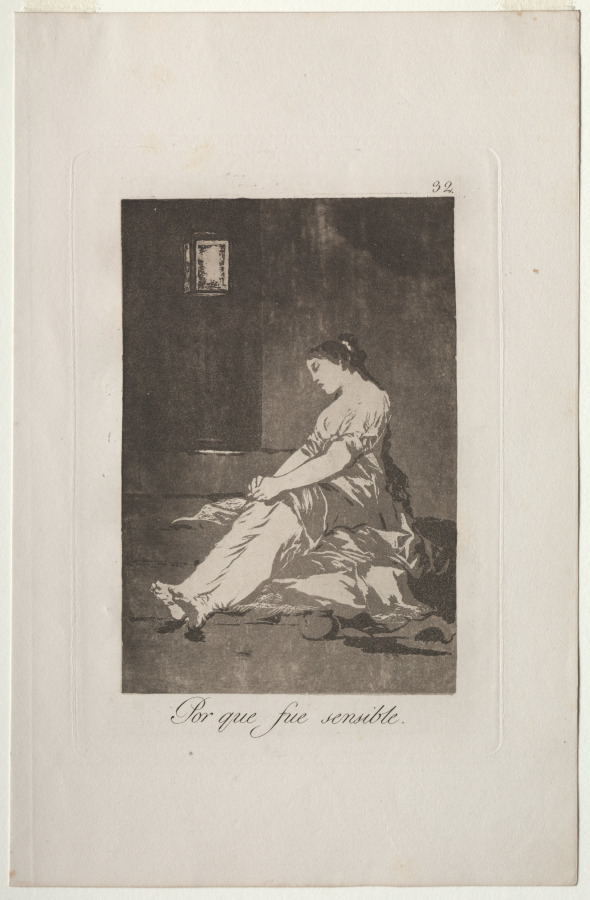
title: Because She Was Susceptible, Plate 32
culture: Spain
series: Los Caprichos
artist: Francisco de Goya (Spanish, 1746–1828)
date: 1799 (printed c. 1855)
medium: etching and aquatint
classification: Print